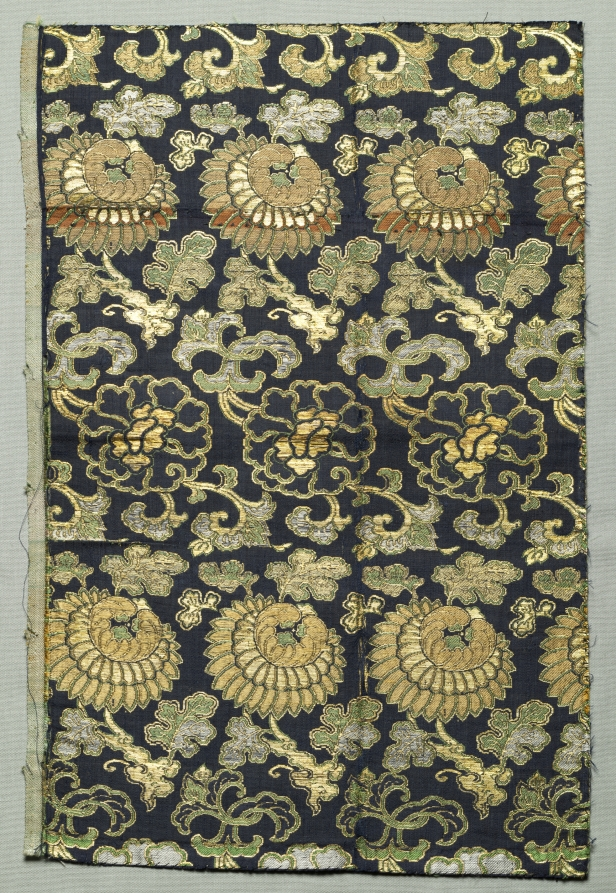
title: Fragment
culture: Japan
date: 1800s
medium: silk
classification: Textile